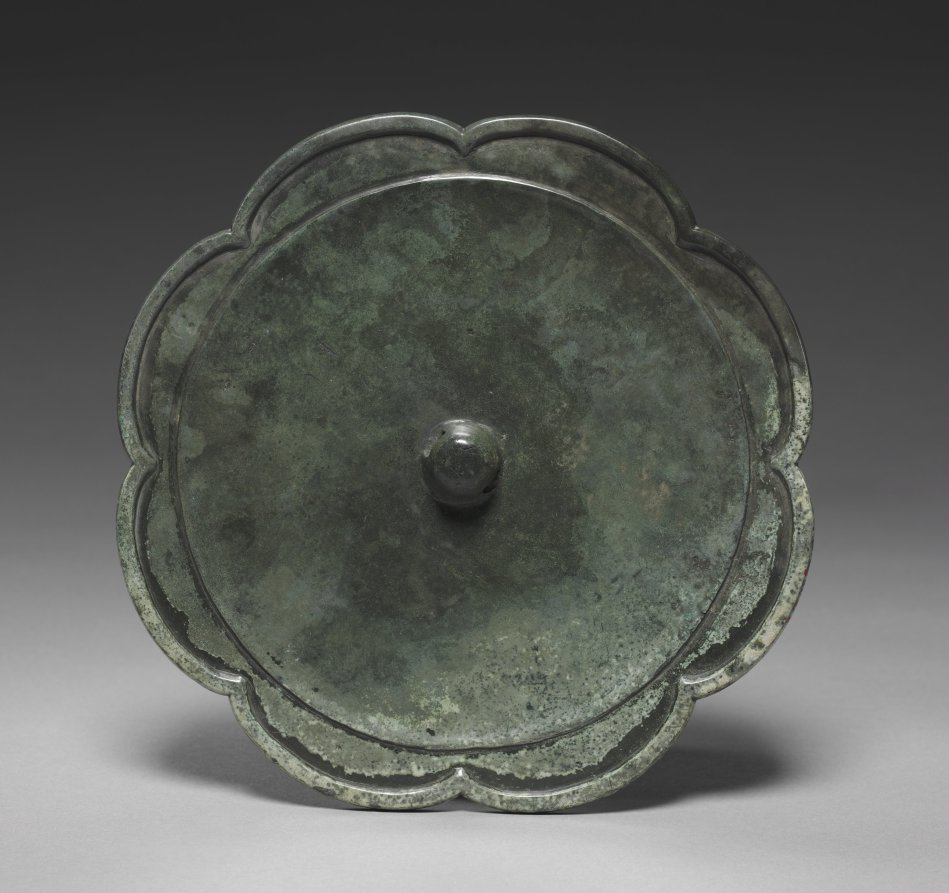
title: Flower-shaped Mirror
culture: Korea, Goryeo dynasty (918–1392)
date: 1100s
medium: bronze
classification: Metalwork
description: From ancient times, a mirror assumed various roles; a ritualistic tool, a diplomatic gift, and a luxury commodity. During the Goryeo dynasty (918-1392), which saw the great advancement of metallurgy, the royal court was the center of distributing sophisticated bronze artifacts. According to historical records, on the 7th day of the Lunar New Year, the king bestowed a bronze mirror inscribed with auspicious symbols upon each court official as part of a ceremony to celebrate the Day of Humans. This explains why a large quantity of bronze mirrors were excavated from elite tombs.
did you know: Due to its origin as an important tool in religion and politics, mirrors are often mentioned in many Korean proverbs that warn certain behaviors.